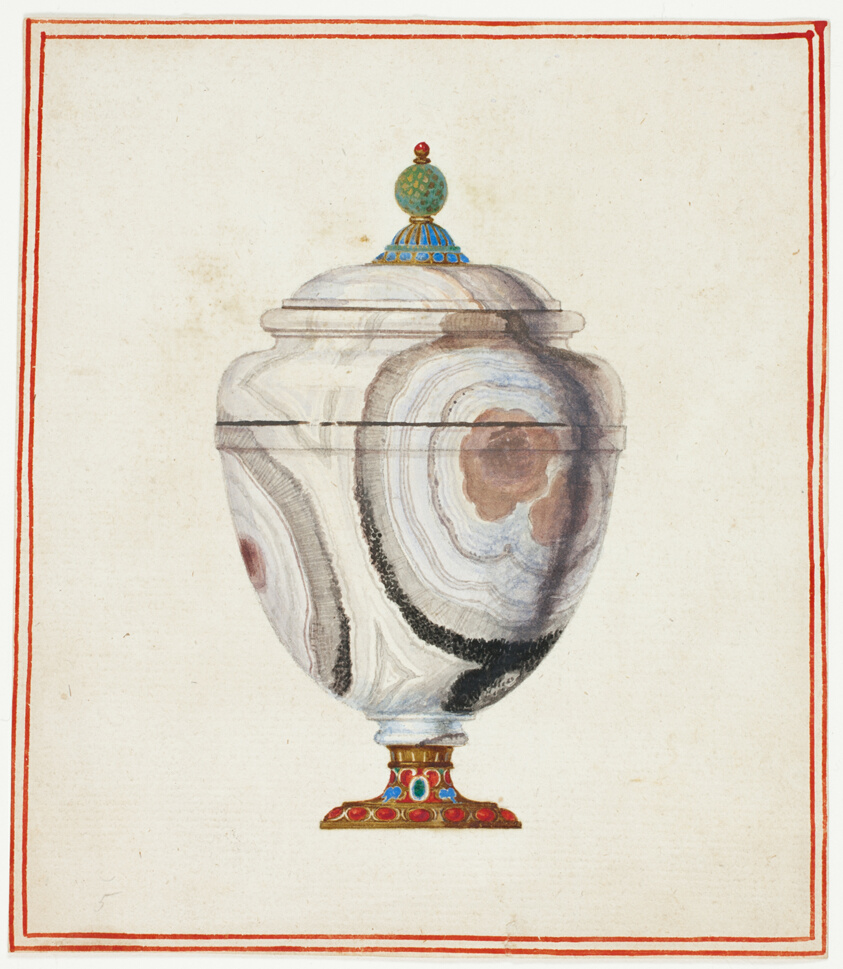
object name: Drawing and Watercolor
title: Stone Urn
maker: Giuseppe Grisoni (Italian, born Flanders, 1699-1769)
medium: Gouache, heightened with touches of gold paint, over black chalk, on ivory laid paper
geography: Flanders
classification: gouache; watercolor; drawings (visual works); prints and drawing